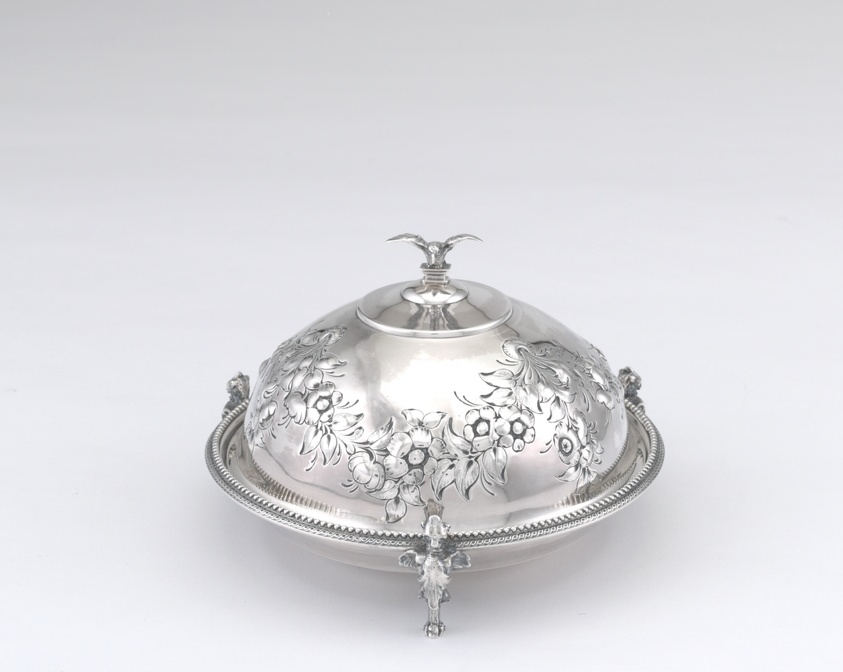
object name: Metalwork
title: Butter Dish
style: 19th century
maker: Gorham Manufacturing Company (American, founded 1831); Providence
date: 1853–65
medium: Silver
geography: Providence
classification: vessel for serving food; dish (vessel); silver; american decorative arts; american arts; decorative arts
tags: butter dish, birds, flowers, eagles, dining, eating